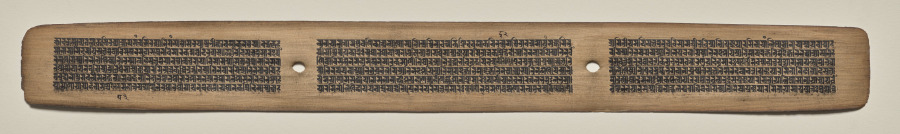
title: Text, Folio 87 (recto), from a Manuscript of the Perfection of Wisdom in Eight Thousand Lines (Ashtasahasrika Prajnaparamita-sutra)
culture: Eastern India, Bihar, Vikramashila Monastery. Painting: Nepal, Kathmandu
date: Sunday, September 14, 1119 (year 239 of the Newar Samvat in the month of Ashvina)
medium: gum tempera and ink on palm leaves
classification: Painting